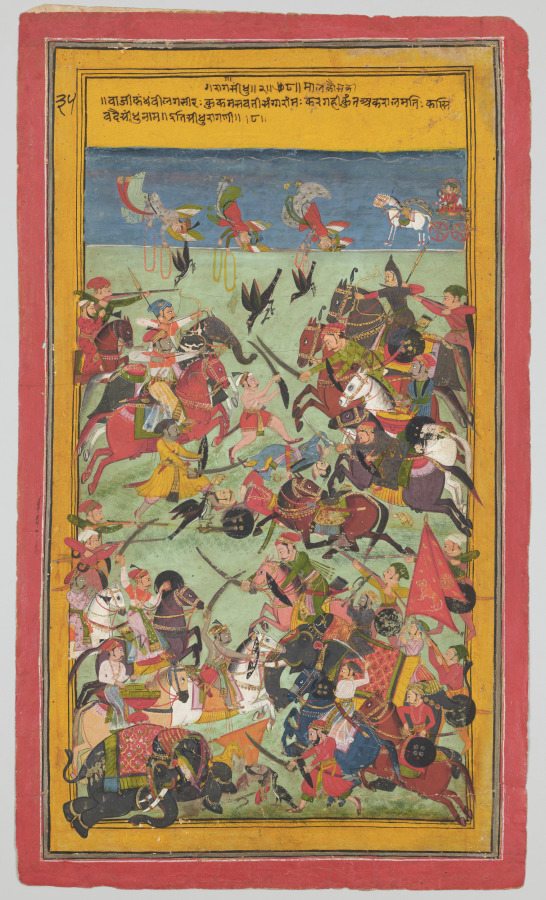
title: Sindhu Raga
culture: Northwestern India, Rajasthan, Rajput Kingdom of Mewar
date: c. 1720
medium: Gum tempera and ink on paper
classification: Painting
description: The inscription at the top identifies this painting as Sindhu Raga, which is the raga (or musical mode) of heroic sentiment. The painting is meant to elicit the same feelings in the viewer as a rousing piece of music played in the Sindhu key. Paintings of Sindhu Raga depict battle scenes. In this example, the composition conveys the chaotic melee and violence of war. Heads are being lopped off; carrion birds swoop down unfazed. Above the horizon against the sky at the far right is the god of war, Karttikeya, in his chariot. Three angels carry garlands for the dead.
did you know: Most of the warriors are on horseback and are armed with bows and arrows, swords, lances, and shields, as well as rifles. Two elephants appear in the foreground.